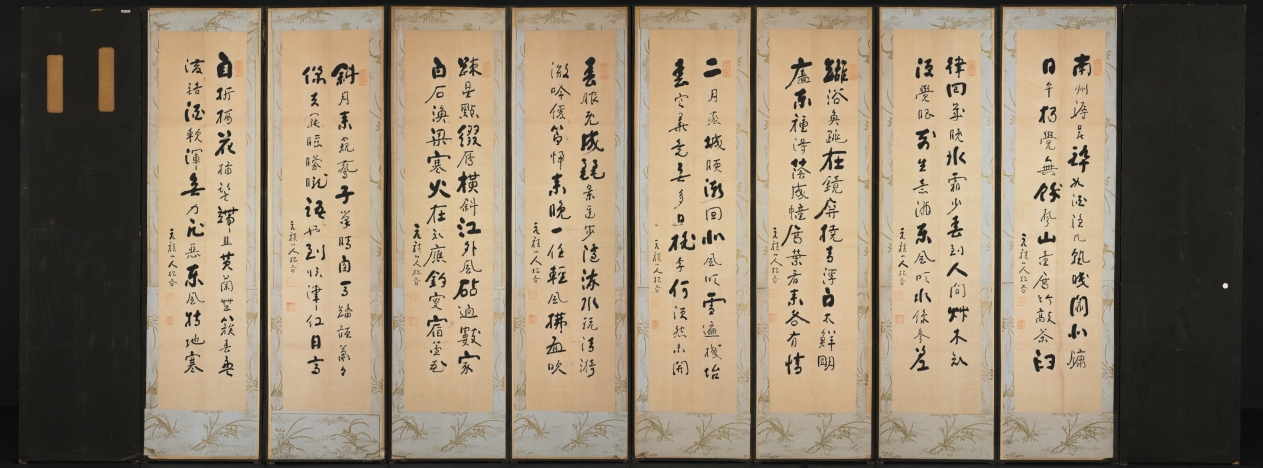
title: Painting of One Hundred Themes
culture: Korea, Joseon dynasty (1392–1910)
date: late 1800s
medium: Ten-panel folding screen affixed with album leaves (obverse), calligraphy (reverse), ink and color on silk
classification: Painting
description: The front of this screen features an assortment of subjects: birds and flowers, landscapes, and scenes of everyday life, mostly in monochromatic ink with light colors. The screen’s reverse side conveys a number of classical poems about the fleeting beauty of the four seasons. Traditionally, only one side of a folding screen bears painted or embroidered images, since these were used as a background furnishing. In Korean houses by the 1800s and early 1900s, however, two-sided folding screens became noticeably popular, possibly inspired by Japanese double-sided folding screens, which mainly served as room dividers in Japanese households.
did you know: The way of displaying small images of various subjects became one of the most popular type of painting toward the end of the 19th century.